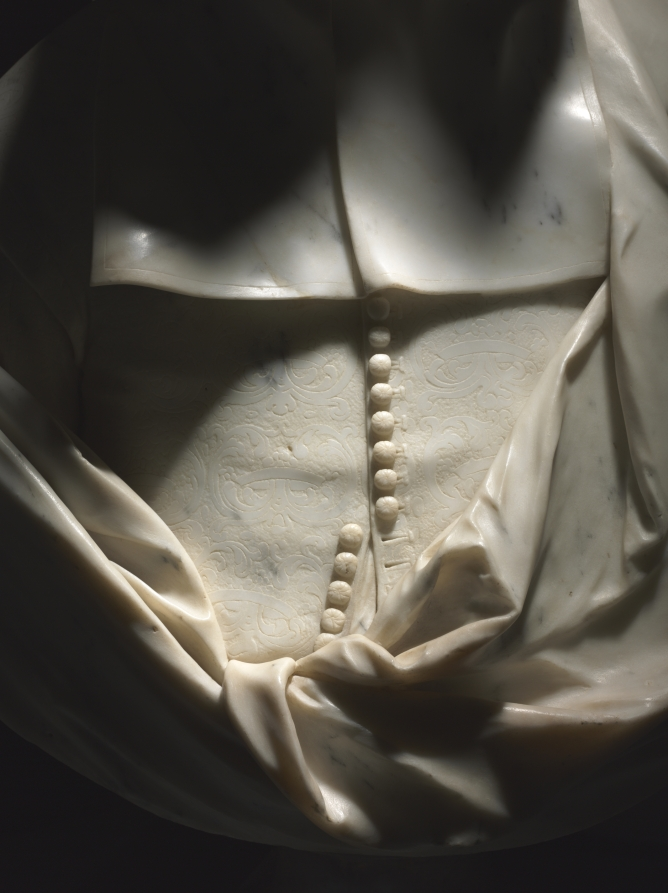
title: Portrait of Fabrizio Naro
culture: Italy, Rome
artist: Domenico Guidi (Italian, 1625–1701)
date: c. 1680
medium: marble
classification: Sculpture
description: This figure’s individualized facial expression, dynamic turn of the head and animated drapery are all characteristic of 17th-century Roman portrait sculpture. Guidi, a pupil of Alessandro Algardi, juxtaposed broad swaths of drapery and deeply drilled and carved hair with delicate surface detail, visible here in the patterning of the jacket and the faint suggestion of a beard. Based on a comparison with a later portrait on the family tomb in the church of Santa Maria sopra Minerva, Rome, the sitter has been identified as Fabrizio Naro (d. 1697), marquis of Mompei.